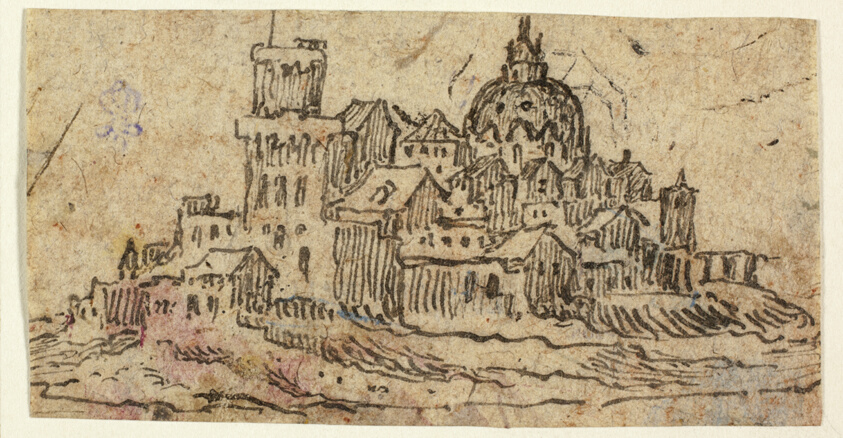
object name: Drawing and Watercolor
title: Citadel with Dome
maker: Unknown Artist; Flemish, 17th century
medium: Pen and brown ink on tan wove paper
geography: Flanders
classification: pen and ink drawings; drawings (visual works); prints and drawing